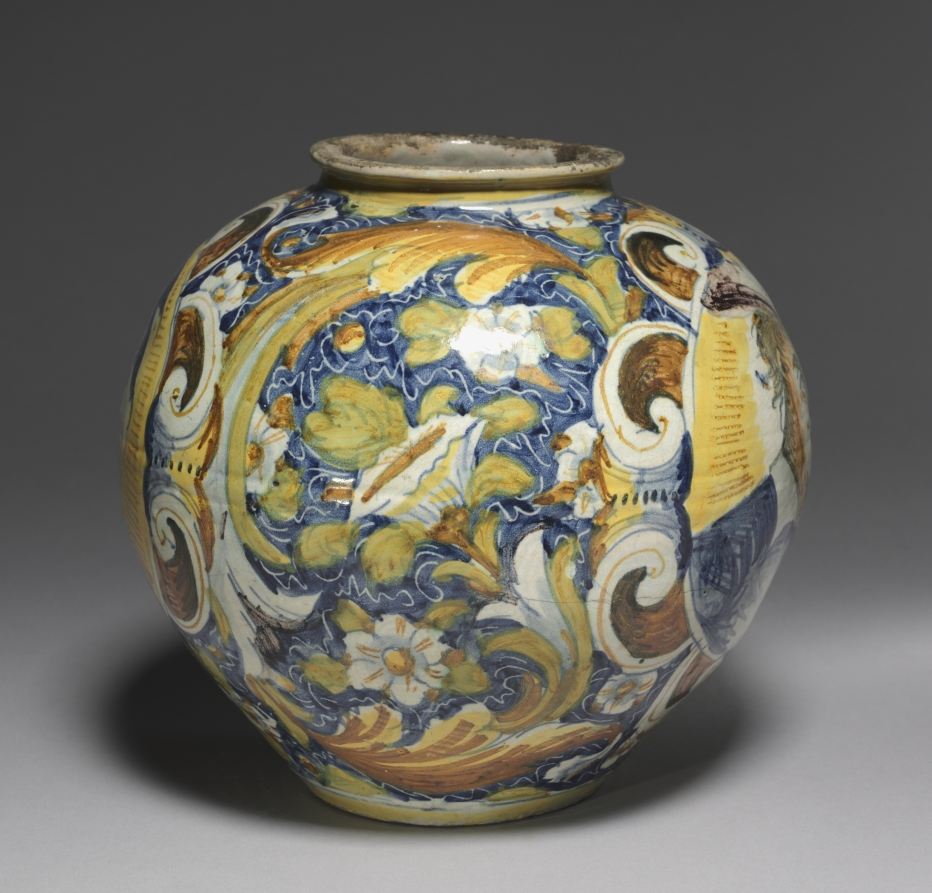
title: Storage Jar (Vaso a Palla)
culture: Italy, Venice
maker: circle of Domenego da Venezia (Italian)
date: c. 1560–80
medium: tin-glazed earthenware (maiolica)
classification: Ceramic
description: During the Italian Renaissance of the 1400s and 1500s, nobles and merchants eager to express their wealth and sophistication ordered ceramics for dining, display, and storage. Known as maiolica, because it resembled the brightly colored ceramics from the Mediterranean island of Majorca, these ceramic vessels were covered with a tin glaze that provided an opaque white surface on which colorful decoration could be painted.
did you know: In contrast to a pharmacy jar, this Vaso a Palla (globular or round-shaped jar), likely served a more domestic function and may have held oil or preserved fruits and nuts.